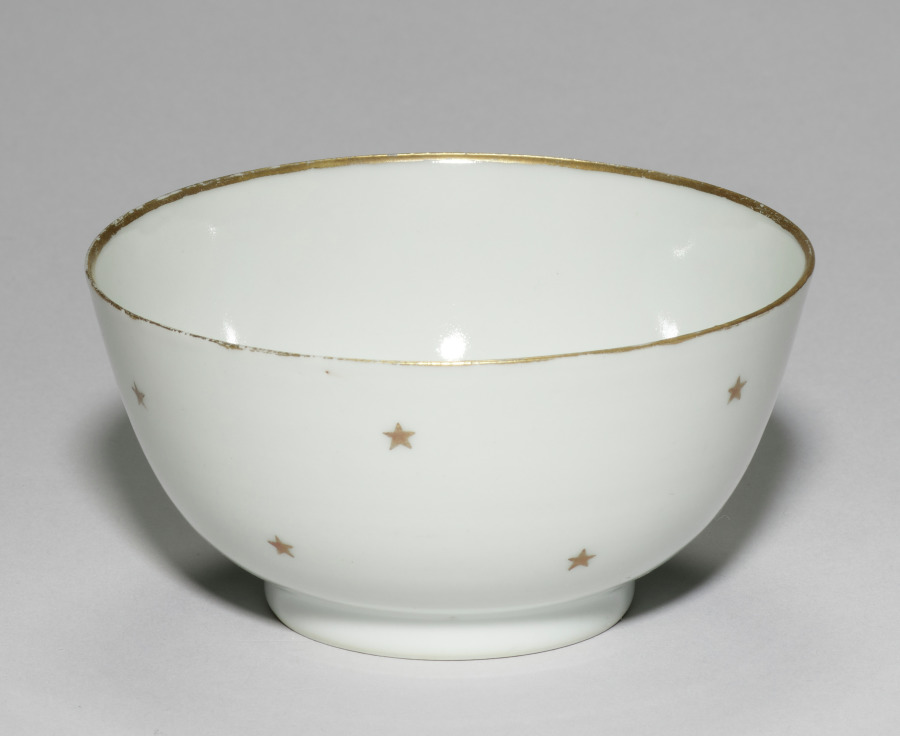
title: Cup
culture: China, Chinese Export, 19th century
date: 1800s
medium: porcelain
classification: Ceramic